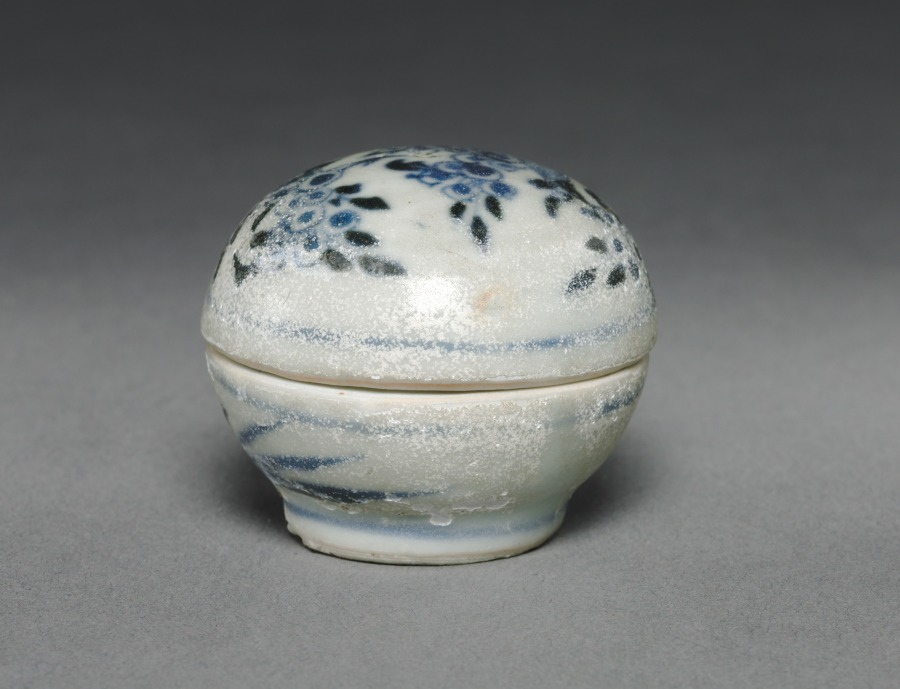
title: Pill Box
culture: China, Qing dynasty (1644-1911)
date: c. 1752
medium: porcelain with blue and white decoration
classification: Ceramic